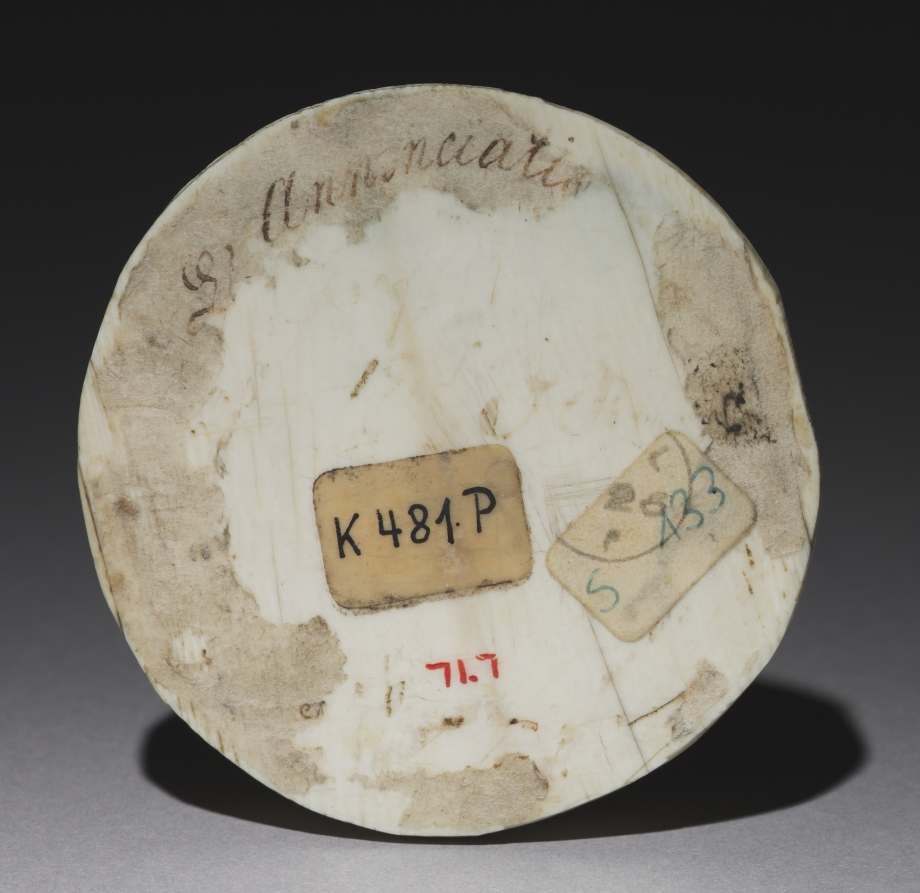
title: Roundel with the Annunciation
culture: Germany, Upper Rhine, 15th century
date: c. 1470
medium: ivory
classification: Ivory